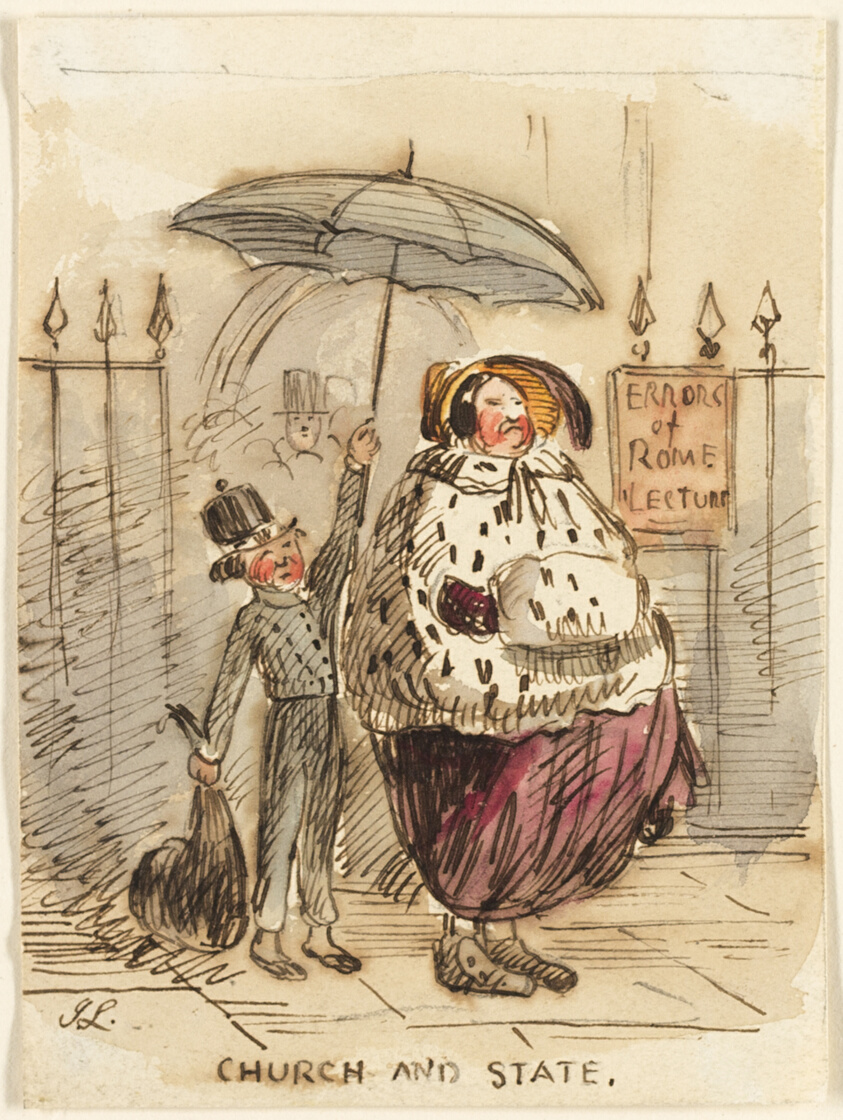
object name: Drawing and Watercolor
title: Church and State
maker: John Leech (English, 1817-1864)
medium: Watercolor and pen and brown ink, over graphite, on cream wove paper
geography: England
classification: watercolor; drawings (visual works); prints and drawing